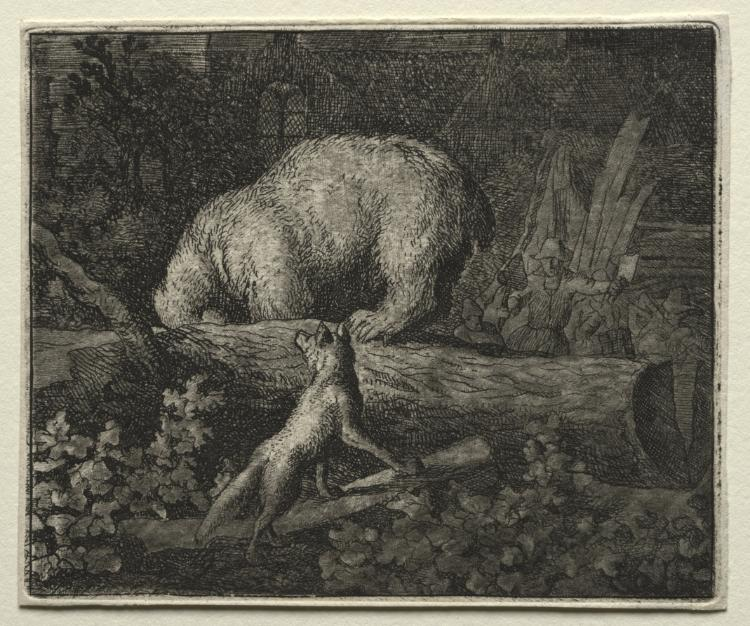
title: Reynard the Fox: Trapping the Bear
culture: Netherlands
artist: Allart van Everdingen (Dutch, 1621–1675)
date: 1650–75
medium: etching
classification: Print